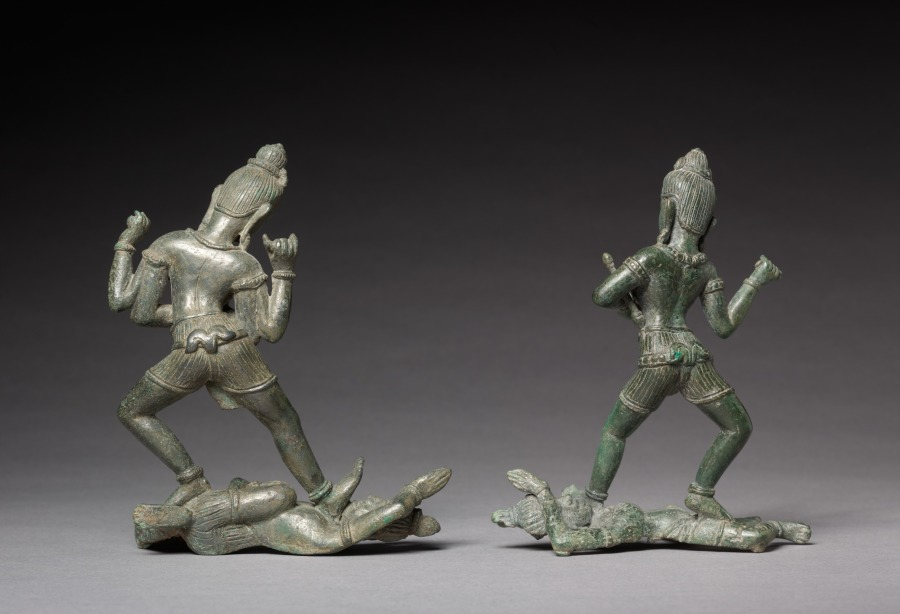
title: Shamvara and A Dakini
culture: Cambodia, Angkor, 11th century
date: c. 1100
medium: bronze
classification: Sculpture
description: Two extremely rare bronzes of tantric Buddhist deities depict the trampling of the personifications of the afflictions that keep beings cycling around the world of samsara, moving from one unhappy birth, death, and rebirth to another. The male figure, a prominent form of a tantric Buddha in Tibetan Buddhism, is four-armed and probably once held a vajra and bell in his crossed hands. The female deity appears to hold a skull cup in her left hand, with a mace in the crook of her elbow, and she grasps an unclear object that may be a flaying knife in her upraised right hand.